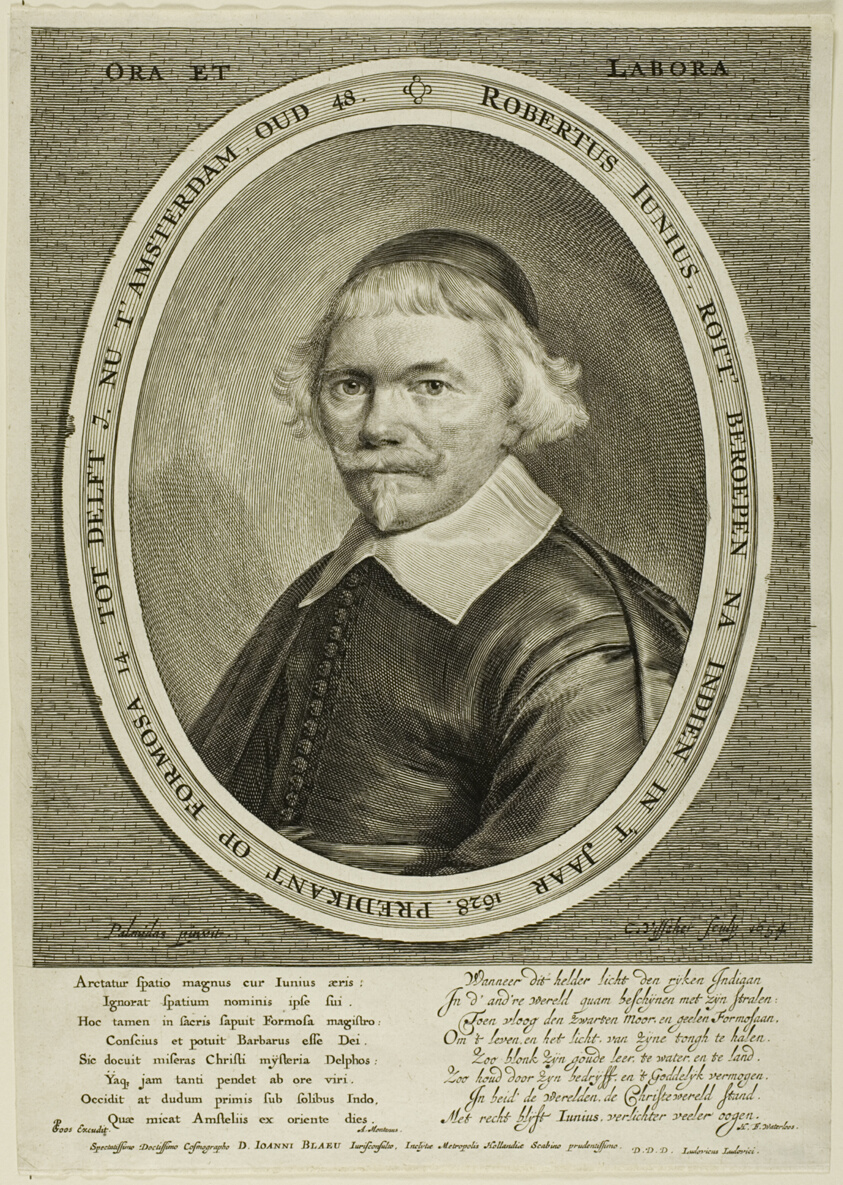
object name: Print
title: Robert Junius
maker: Cornelis Visscher (Dutch, c. 1629-1658); after Anthonie Palamedesz (Dutch, 1601-1673)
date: 1654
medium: Engraving on paper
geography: Holland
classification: print; prints and drawing